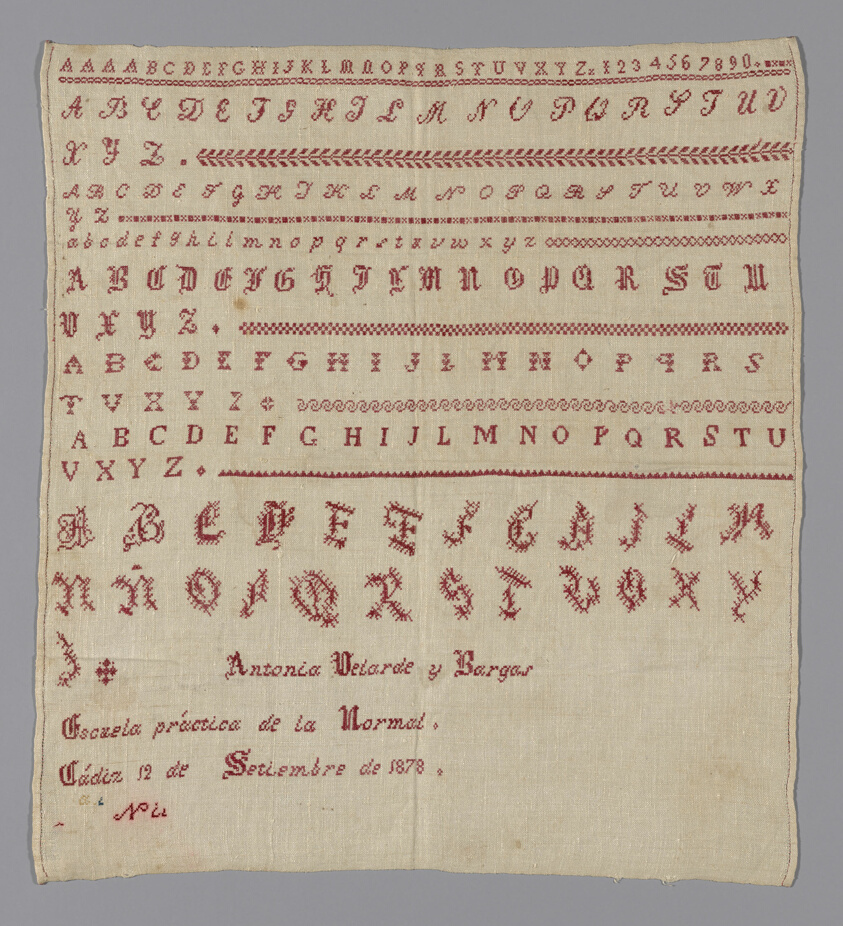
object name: Textile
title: Sampler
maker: Spain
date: 1878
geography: Spain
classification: textile; needlework (visual works); sampler